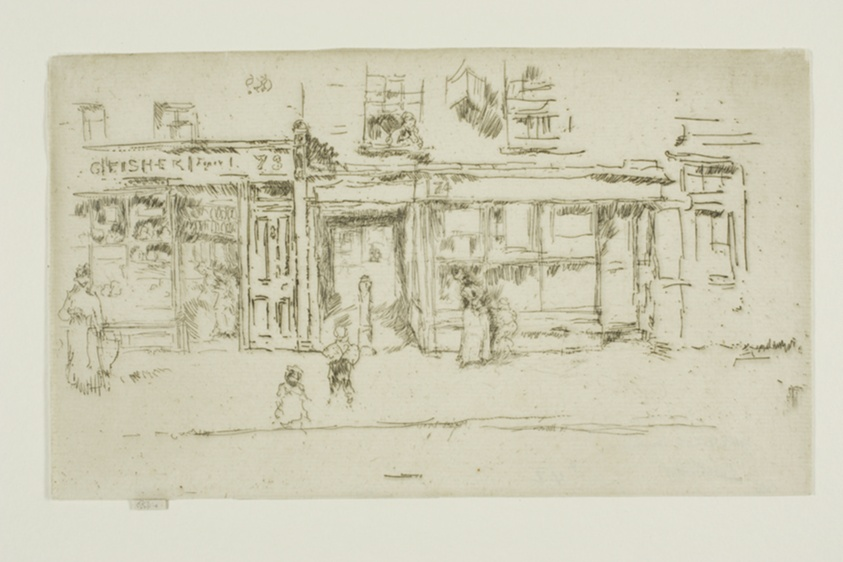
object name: Print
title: York Street, Westminster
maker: James McNeill Whistler (American, 1834-1903)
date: 1888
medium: Etching and drypoint with foul biting in black ink on ivory laid paper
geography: United States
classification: etching; foul biting; print; prints and drawing; drypoint; paper